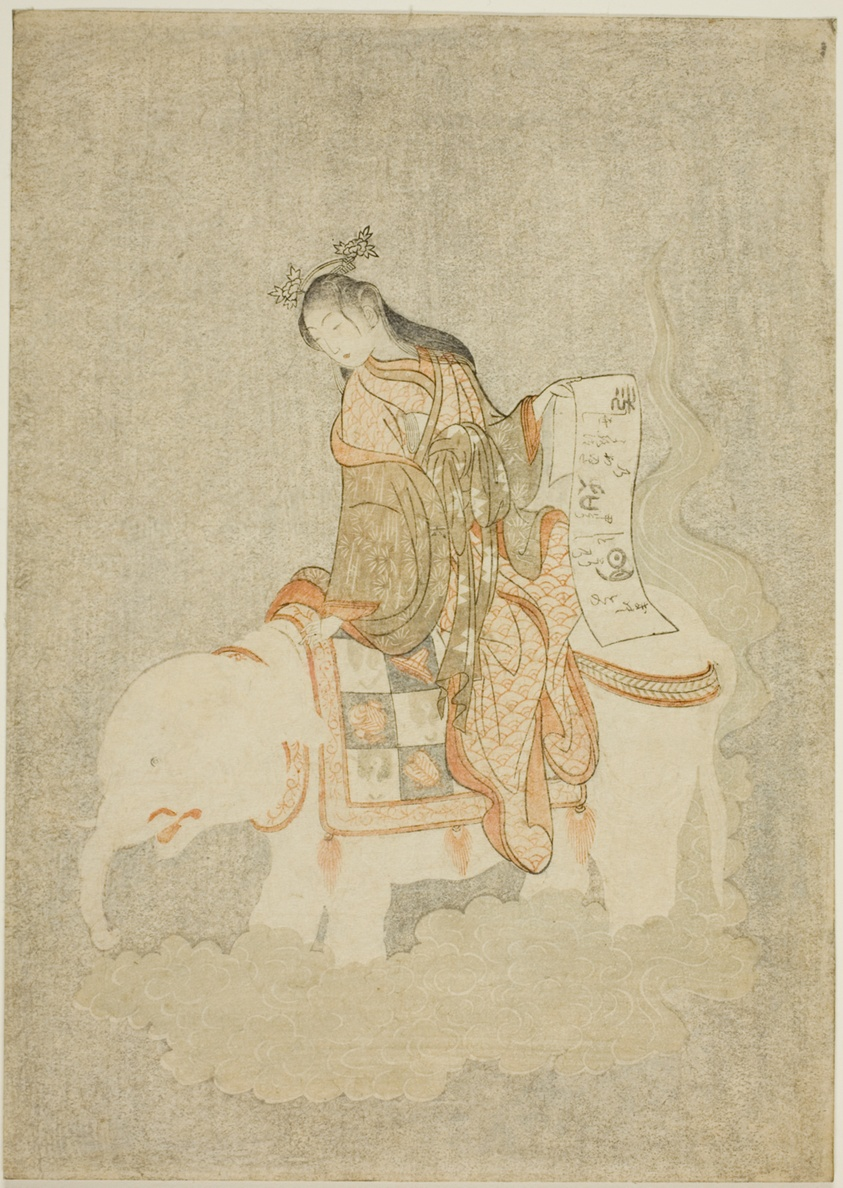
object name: Print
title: Courtesan on White Elephant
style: Japanese (culture or style)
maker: Attributed to Suzuki Harunobu 鈴木 春信; Japanese, 1725 (?)-1770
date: 1765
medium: Color woodblock print; chuban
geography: Japan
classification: print; asian art